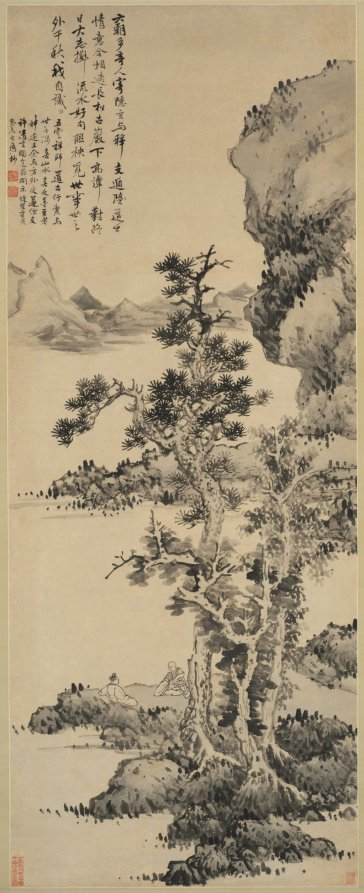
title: Zhi and Xu's Pure Conversation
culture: China, Ming dynasty (1368–1644)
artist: Lan Ying (Chinese, 1585–after 1664)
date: 1643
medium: Hanging scroll; ink on paper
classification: Painting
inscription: 六朝多奇人，寄隱玄與釋。/ 支遁許道士，情意合相適。/ 長松古巖下，高譚對終日。/ 大志擲流水，好句聯袂覓。/ 世事世之外，千秋我自識。 五雲禪師道古行潔，與世無涉。喜山水，喜文 墨。至老神逾王。余與方外交，遂作支許清言 圖，乞為開示。 蝶叟藍瑛癸未七月杪。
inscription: 2 additional seals of Cheng Qi 程琦 (1911–1988)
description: Lan Ying’s painting is a gift to his friend, the Chan monk Wuyun, in which he depicted two sages of the Six Dynasties period: the Buddhist monk Zhidun (314–366 CE), and the Daoist priest Xu Xun (265–420 CE). Meant to be understood as an analogy of the friendship between artist and monk, the painting also offered a retreat into the past, a year before the fall of the Ming dynasty. A professional painter born in Hangzhou, Lan Ying is traditionally considered a last representative of the Zhe school. Lan wrote poetic inscriptions and interacted with the literatus Chen Jiru (1558–1639).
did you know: This painting serves as an analogy of the friendship between artist and monk.